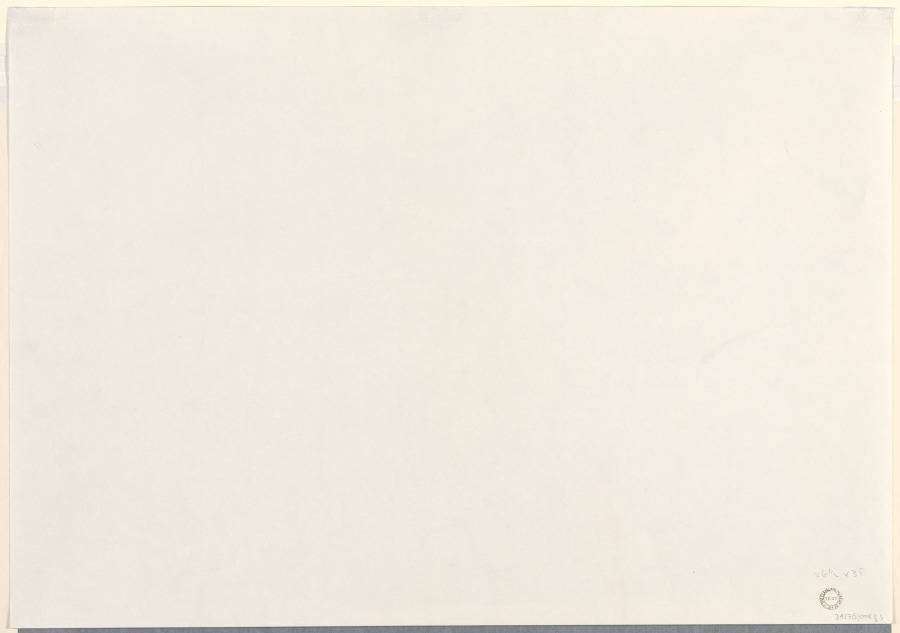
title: Pilgrims Returning from the Feast Day of the Madonna dell'Arco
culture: France, 19th century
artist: Léopold Robert (Swiss, 1794–1835)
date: 1827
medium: pencil with white ink corrections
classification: Drawing